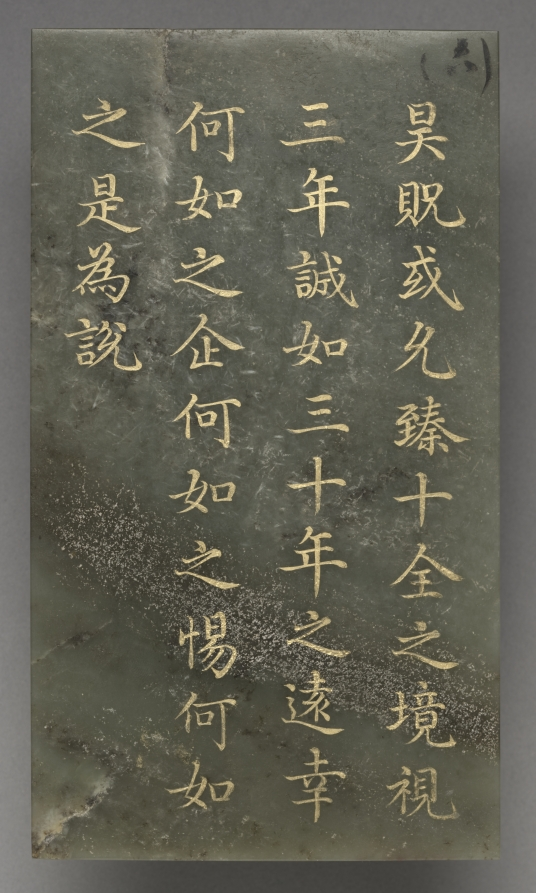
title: Tablet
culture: China, Qing dynasty (1644–1911), Qianlong reign (1736–95)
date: 1778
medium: jade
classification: Jade